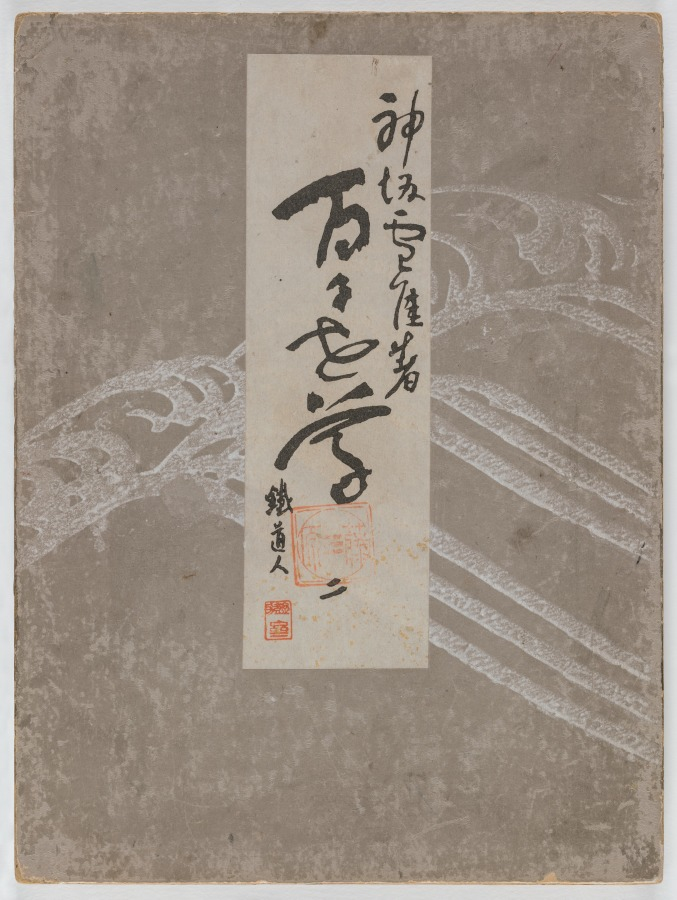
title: Flowers of a Hundred Worlds (Momoyogusa), Vol. 2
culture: Japan, Meiji period (1868–1912)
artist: Kamisaka Sekka (Japanese, 1866–1942)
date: 1909–10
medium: one of a set of three woodblock printed folding-books; ink, color, gold, and silver on paper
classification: Bound Volume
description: This volume from a set of three woodblock printed albums displays the graphic design prowess of Kamisaka Sekka. The images were first distributed one by one to subscribers to the series but later were reissued in bound form, like this book, for mass consumers. Each print features a vignette taken from nature or Japanese literature. Many of the scenes have a long history in Japan, originating in the 900s or 1000s and having been interpreted by all manner of artists since that time. Sekka’s selections hew closely to precedents from the Rinpa style originated by painter Tawaraya Sōtatsu (c. 1570–c. 1640) and calligrapher Hon’ami Kōetsu (1558–1637).